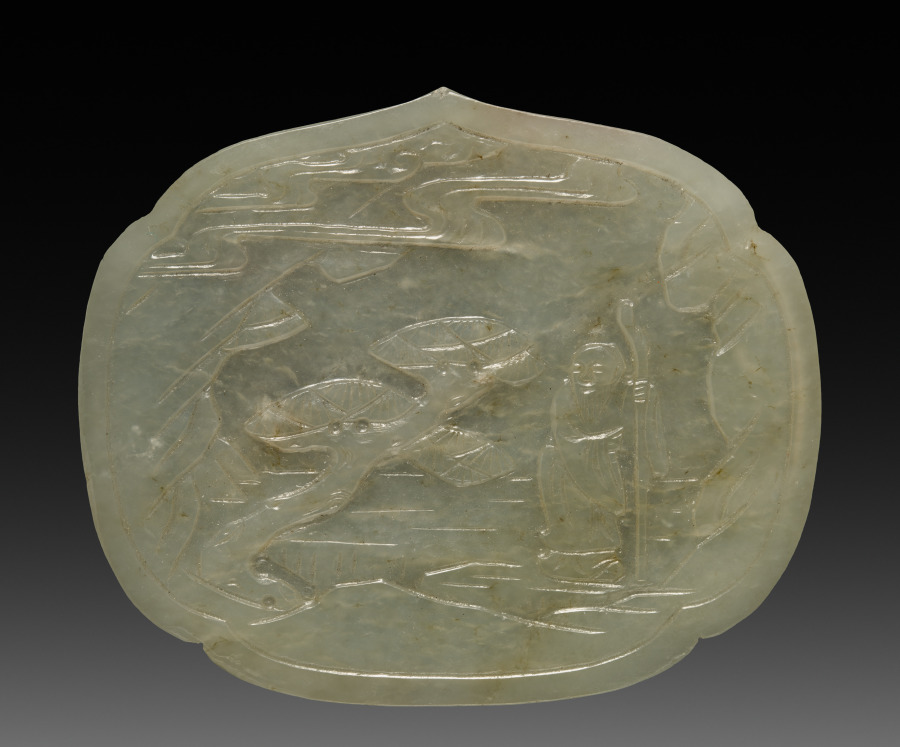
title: Plaque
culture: China, Qing dynasty (1644–1911)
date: 1800s–early 1900s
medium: jade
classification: Jade